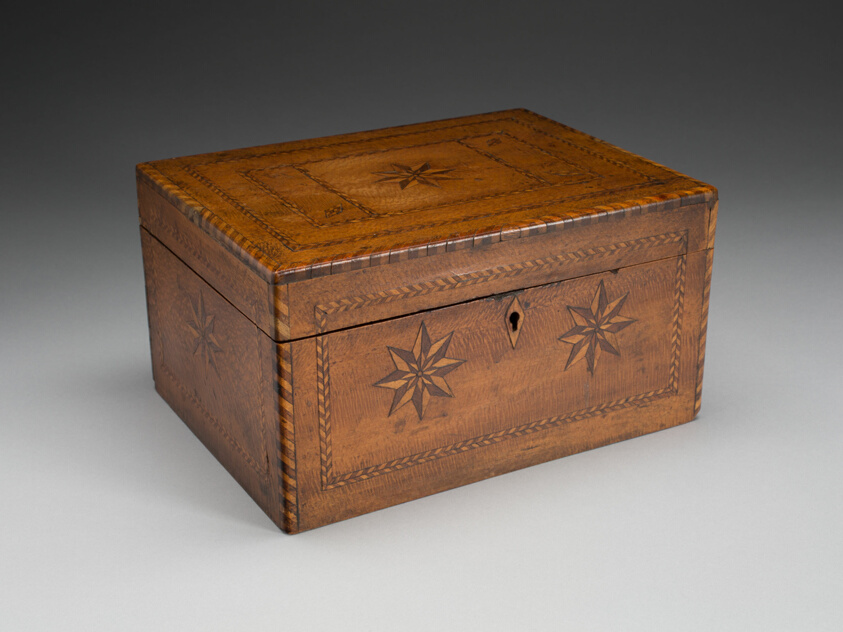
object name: Decorative Arts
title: Box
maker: Artist unknown (American, 18th–19th century); New England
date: 1790–1810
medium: Sycamore, walnut, and white pine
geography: New England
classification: case furniture; box; furniture; american decorative arts; american arts; decorative arts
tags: furniture